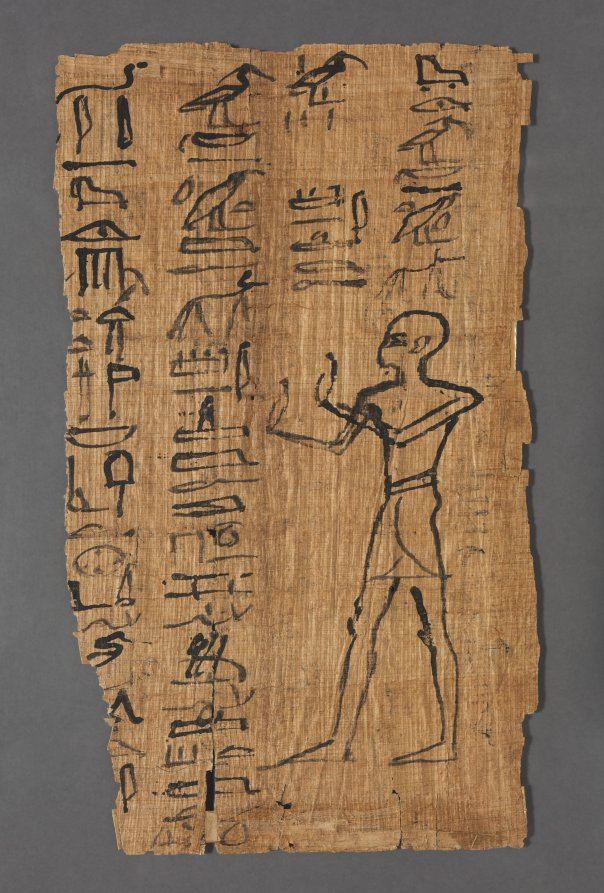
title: Vignette of the Book of the Dead of Bakenmut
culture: Egypt, Third Intermediate (1069–715 BCE), Dynasties 21–22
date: 1000–900 BCE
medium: papyrus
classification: Funerary Equipment